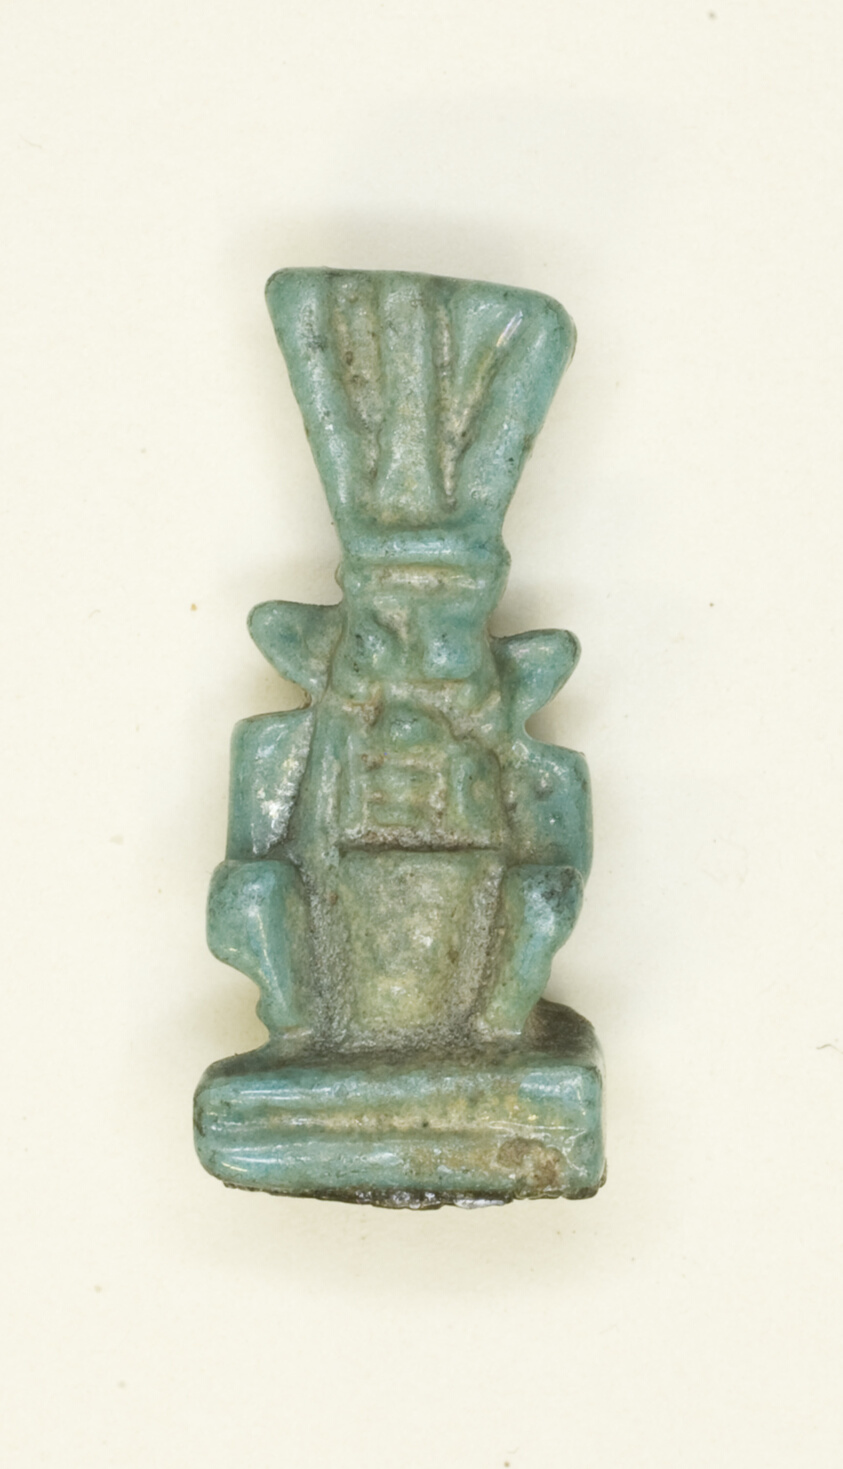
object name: Costume and Accessories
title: Amulet of the God Bes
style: egyptian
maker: Egyptian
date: Third Intermediate Period–Late Period, Dynasty 21–31 (about 1069–332 BCE)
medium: Faience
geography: Egypt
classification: amulet; jewelry; ceramics; ancient art; costume; faïence (composite material)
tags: gods (deities)